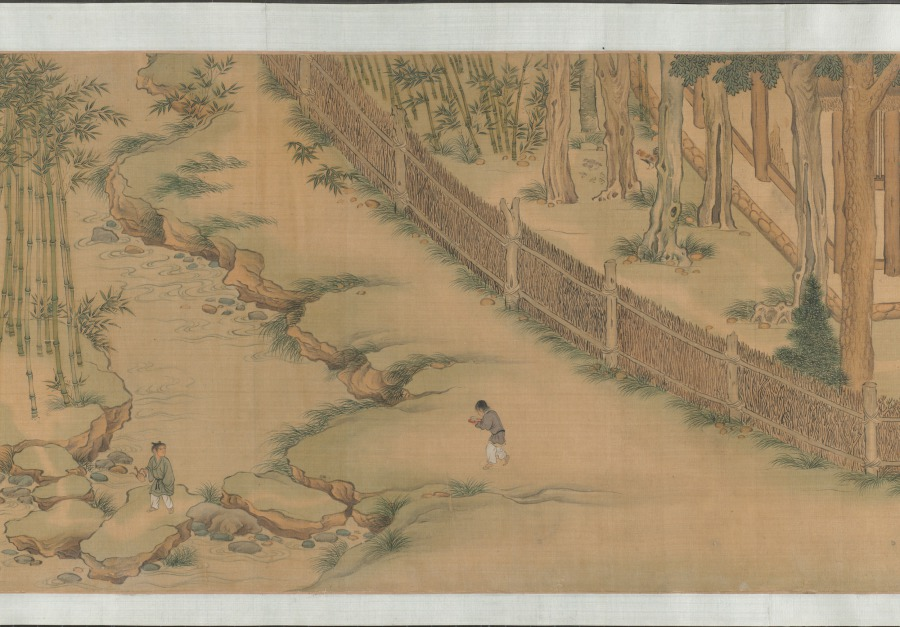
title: Garden for Solitary Enjoyment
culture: China, Ming dynasty (1368–1644)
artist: Qiu Ying (Chinese, 1494–1552)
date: 1515–52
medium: Handscroll; ink and light color on silk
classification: Painting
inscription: Accompanying text of an essay together with seven poems of Sima Guang (1019–1086) and one poem of Su Shi (1037–1101) written by Wen Zhengming (1470–1559) in 1558.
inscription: 2 colophons and 82 seals: 4 seals of Wen Zhengming 文徵明 (1470–1559); 59 seals of Xiang Yuanbian 項元汴 (1525–1590); 1 colophon, dated 1644, and 7 seals of Xiang Yukui 項禹揆 (c. late 1500s–1659); 1 colophon, dated 1880, and 2 seals of Weng Tonghe 翁同龢 (1830–1904); 2 seals of Ch'eng Chen-i (19th c.); 1 seal of Han Ch'ung (19th c.); 4 seals of Wan-go H. C. Weng 翁萬戈 (1918–2020); 3 seals unidentified.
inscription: Colophon by Xiang Yukui 項禹揆 (c. late 1500s–1659): The painting of The Garden for Self-enjoyment on the right by Shih-chou, Mr. Qiu [Qiu Ying] is in the style of Li Lung-mien. Its mood is peaceful, as if meeting the ancient gentlemen face to face among the brushes and silk; it lifts one above the sordid bustle of life. Formerly, my late father handed me this scroll which had only the painting without the written essay. I considered asking a good calligrapher to write the essay to add to it but was afraid that the quality of the writing would not match the painting. Several years later, I saw at a friend's house this essay and poems (of Ssu-ma Kuang] written by Hengshan [Wen Zhengming], once owned by my grandfather; so I spared no expense to obtain it. I rejoiced at this and said: "The divine swords are finally united. How things are pre-destined!" Now my friend Chang Kung-chao's technique for mounting [painting and calligraphy] is excellent. Therefore by daring to take them out and join them together, I can preserve this beautiful story of singular reunion. Xiang Yukui recorded at Hai-yeh-t'ang [hall] two days before New Year's Eve in the jiasheng year of the Chongzhen era [1644]. trans. LYSL/HK/WKH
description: Garden of Solitary Enjoyment refers to a site built in 1073 by the statesman Sima Guang (1019–1086) after he had retired to Luoyang, Henan province. Every spring, visitors would flock to his garden. Each of its seven structures references a historic figure. Sima wrote: I channel streams [like Du Mu], to water flowers [like Bai Juyi], or trim bamboo [like Wang Huizhi]. . . . I know of no joy between heaven and earth that could take its place. Qiu Ying’s painting, created after an 11th-century version of the same theme, must have appealed to garden owners of the Ming dynasty, since it became the template for numerous Suzhou workshop copies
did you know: Sima Guang completed his monumental survey of Chinese history, Zizhi tongjian, in the garden depicted in this painting.